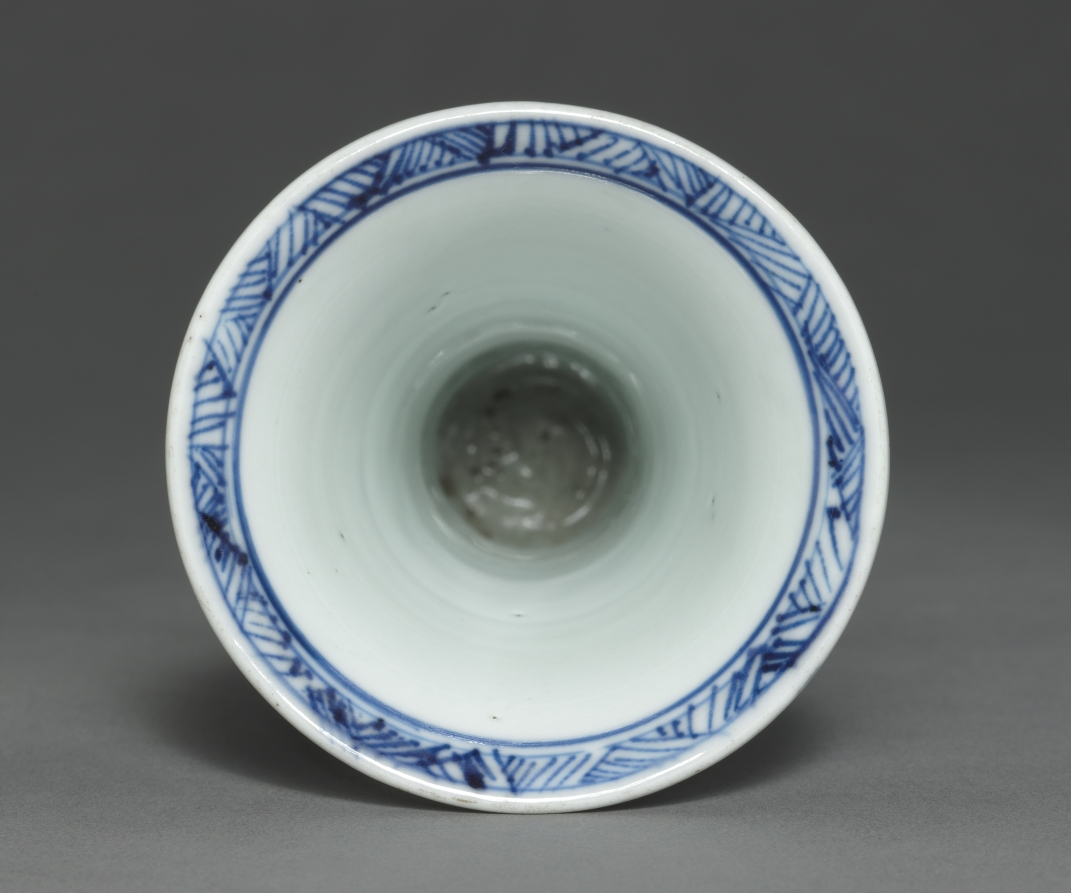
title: Beaker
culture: China, Qing dynasty (1644-1911), Daoguang reign (1821-1850) - Xianfeng reign (1851-1861)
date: 19th Century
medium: porcelain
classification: Ceramic